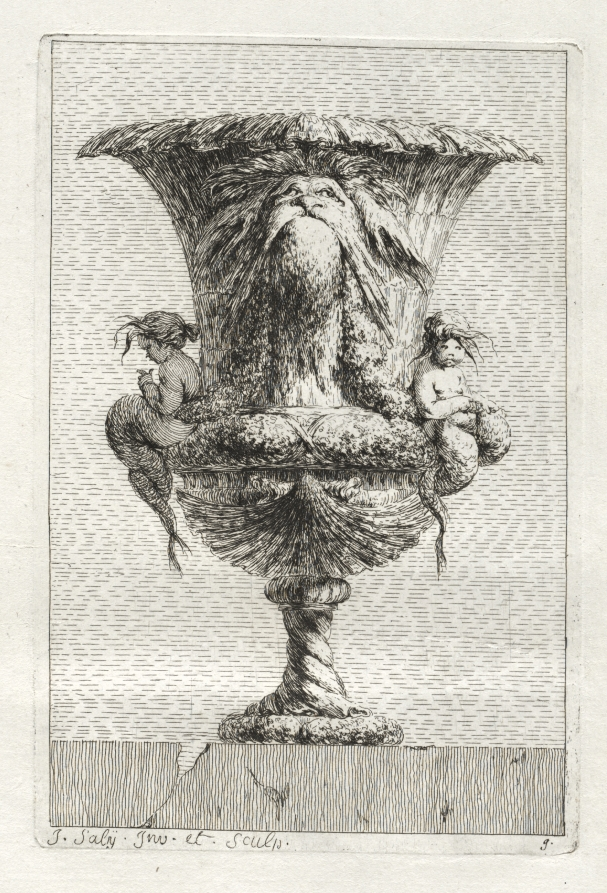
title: Suite of Vases: Plate 9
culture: France, 18th century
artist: Jacques François Saly (French, 1717–1776)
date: 1746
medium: etching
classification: Print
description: Designing ornamental vases or urns was particularly popular during the mid-18th century since the only limit to the possibilities was the imagination of the artist. Saly, a sculptor by training, was a student at the French Academy in Rome from 1740 to 1746, at which time he published a set of 30 etchings. Saly began with basic antique vase forms but deviated from classical ornament to use a rich variety of fantastic creatures for embellishment.